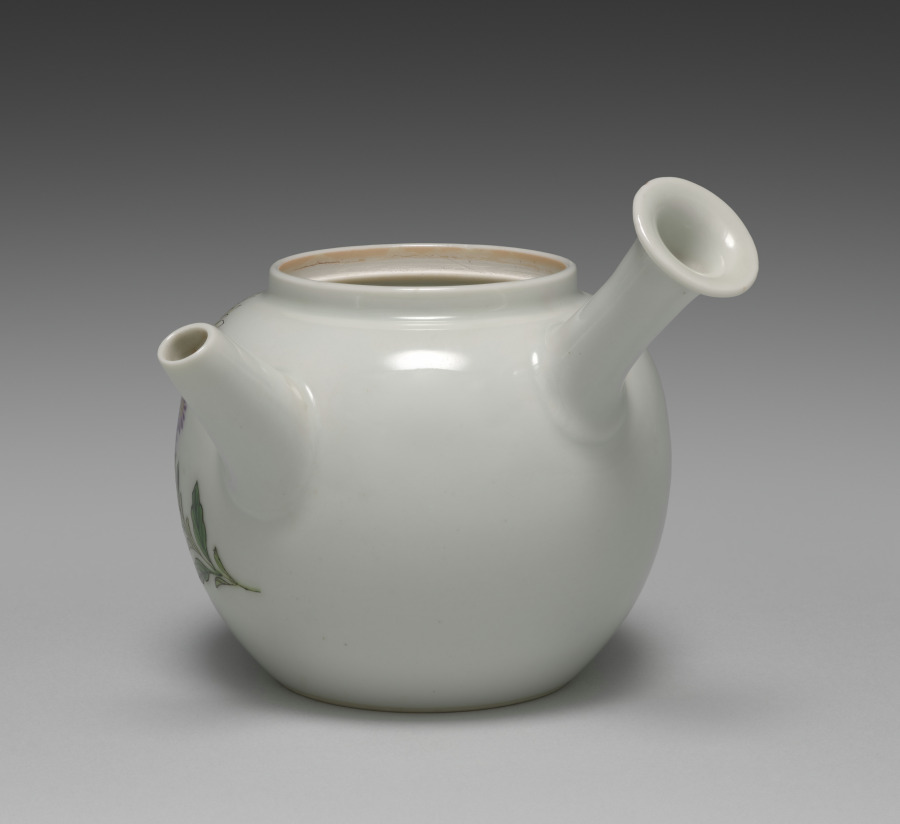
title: Teapot with Chrysanthemums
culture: Japan, Meiji period (1868–1912)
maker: Seifū Yohei III (Japanese, 1851–1914)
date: 1912–14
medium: Porcelain with overglaze color enamel and gold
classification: Ceramic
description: This teapot with recessed lid has a bold, realistic design of pale yellow and white chrysanthemums rendered in overglaze color enamels and dotted gold centers. Black contour lines define the yellow and white flowers and their green stems and leaves. Small pink and purple chrysanthemums are rendered as simple motifs, their shapes defined in contrast to the white ground of the pot.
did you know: This side-handled teapot is designed for brewing and serving sencha.